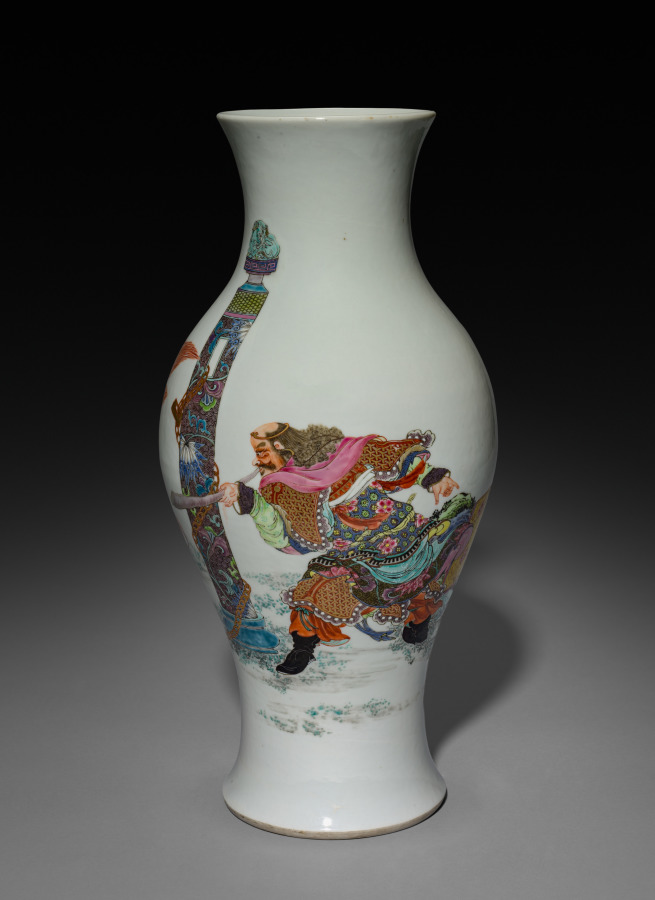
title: Vase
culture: China, Qing dynasty (1644–1911), Qianlong reign (1736–95)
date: 1736–95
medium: porcelain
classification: Ceramic